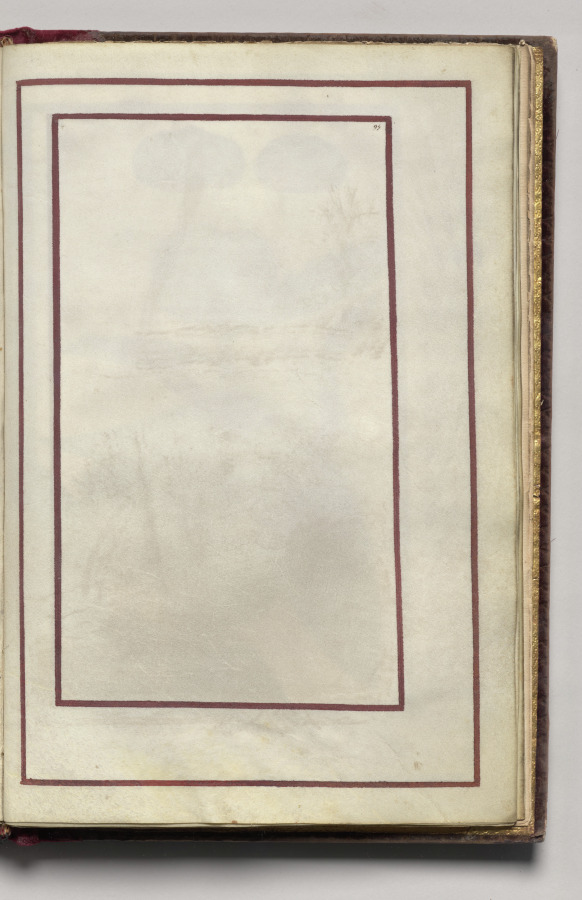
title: Border, folio 42 (recto), from Florilegium (A Book of Flower Studies)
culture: France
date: 1608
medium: watercolor, ink, silver and gold over occasional traces of pencil, on vellum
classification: Bound Volume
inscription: Dated: Poitiers 1608 (on frontispiece) Signed: On frontispiece in black ink, lower right: Van Kuyk Notation on drawing: Frontispiece: in pencil, lower margin: * élève de Van Kessel, peintre flammand (* in pencil also appears in front of Van Kuyk's name).